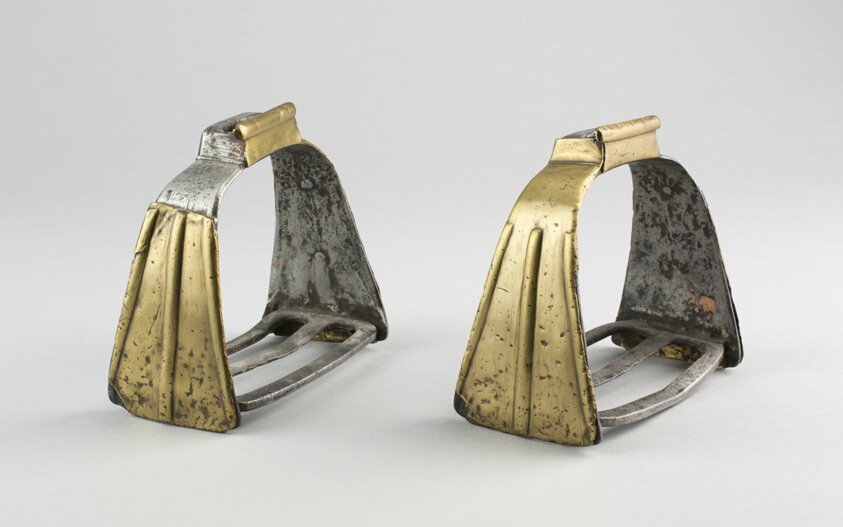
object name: Armor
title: Pair of Stirrups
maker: German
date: 19th century in early 16th century German style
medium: Iron, brass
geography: Germany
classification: horse equipment; armor; arms and armor